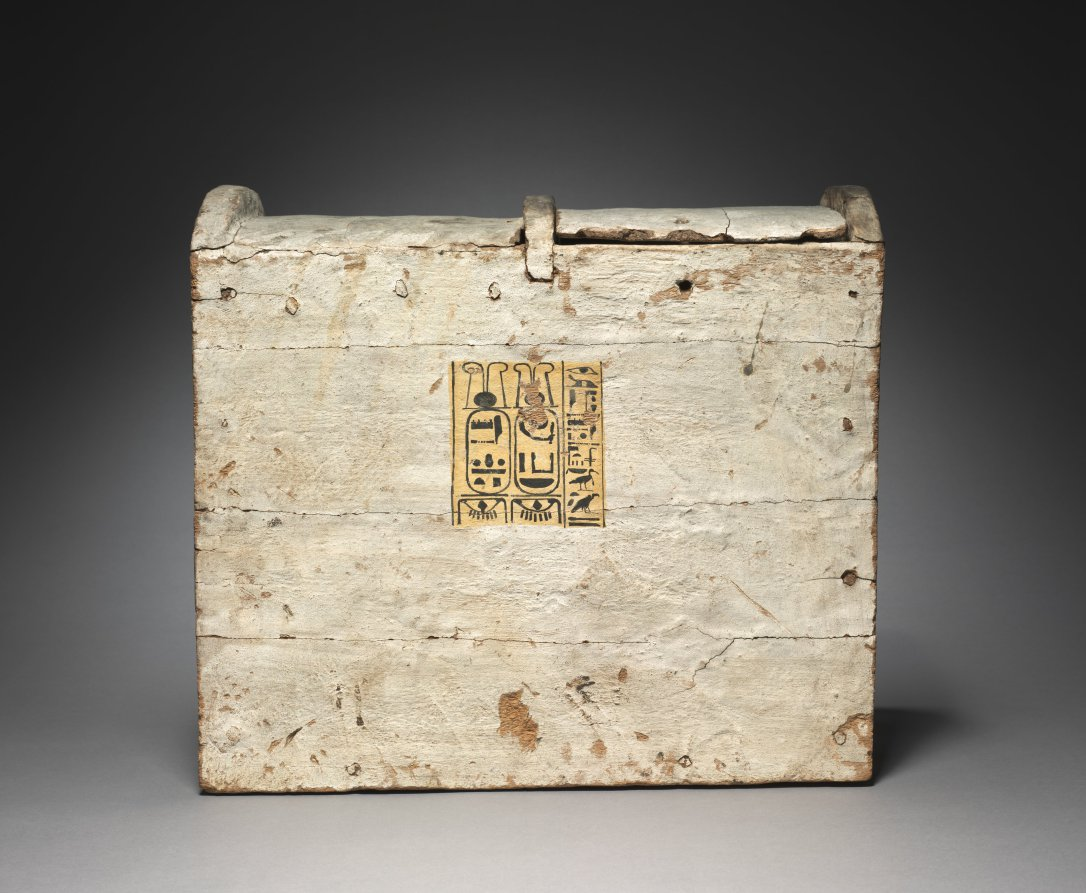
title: Shawabty Box of Bakenmut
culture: Egypt, Third Intermediate (1069–715 BCE), Dynasties 21–22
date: 1000–900 BCE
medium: gessoed and painted buckthorn wood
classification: Funerary Equipment